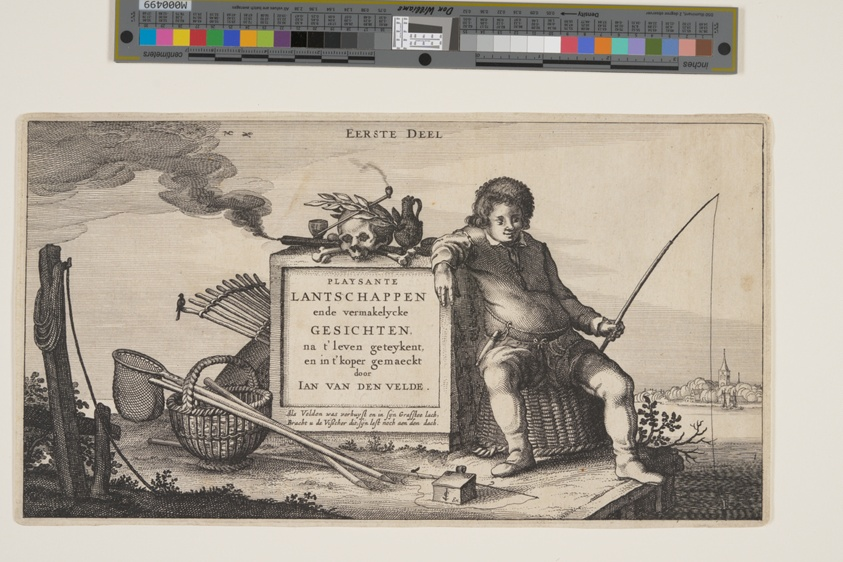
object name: Print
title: Title page, from Landscapes (Playsante Lantschappen)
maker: Attributed to Claes Jansz. Visscher II (Dutch, 1586-1652); after Jan van de Velde II (Dutch, c. 1593-1641)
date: c. 1641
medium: Etching, with engraving, on ivory laid paper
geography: Netherlands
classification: etching; paper; print; prints and drawing